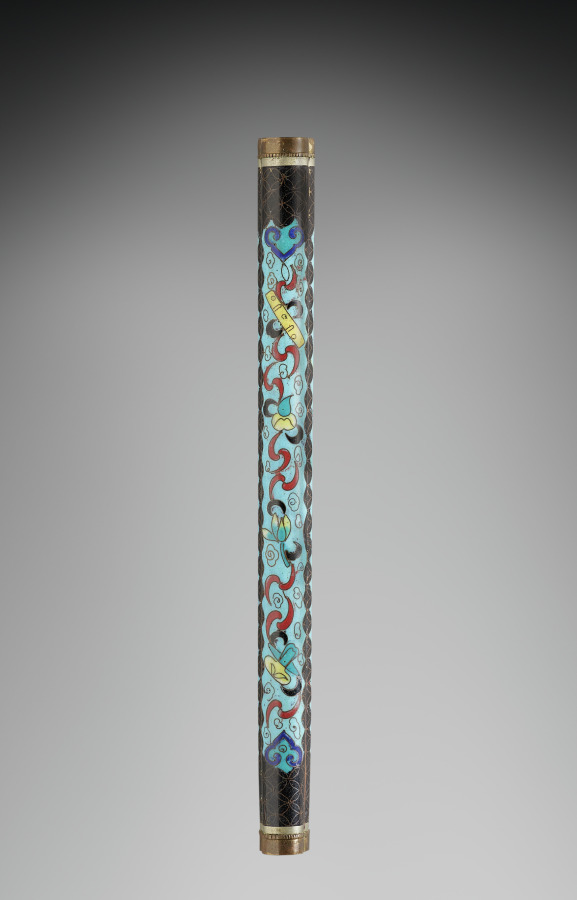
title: Case for Chopstick and Knife Kit -Souvenir Trade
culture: Japan, Meiji period (1868–1912) to Taishō period (1912–26)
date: early 1900s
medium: enamel, wood, walrus ivory or bone, metal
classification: Implements